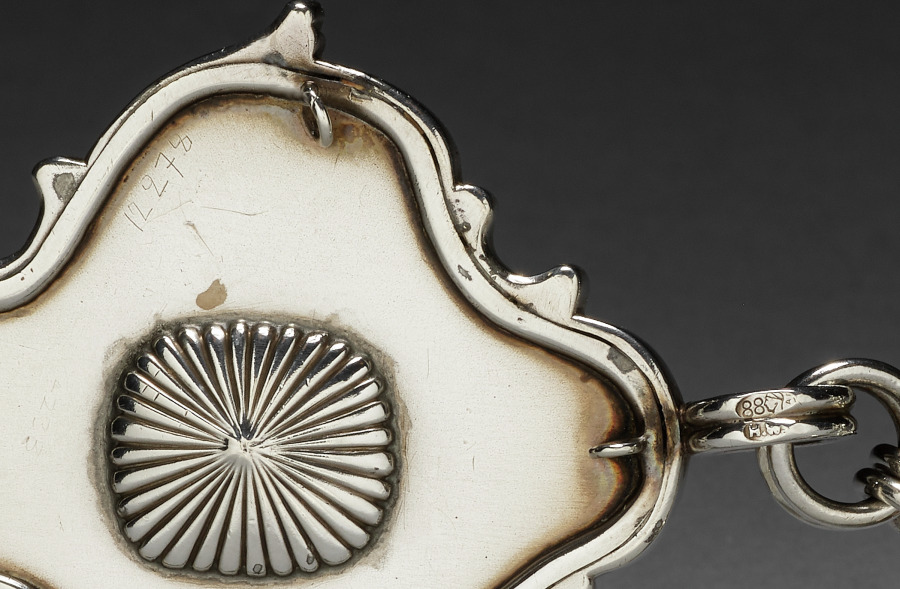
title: Cloak Clasp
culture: Russian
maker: House of Fabergé (Russian, 1842–1918)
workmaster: Henrik Wigström (Russian, 1862–1923)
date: c.1903–8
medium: aquamarine, half pearl bezel, oyster guilloché enamel, silver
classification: Jewelry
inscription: Inscribed with the Cyrillic initials “HW”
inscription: “88” silver standard